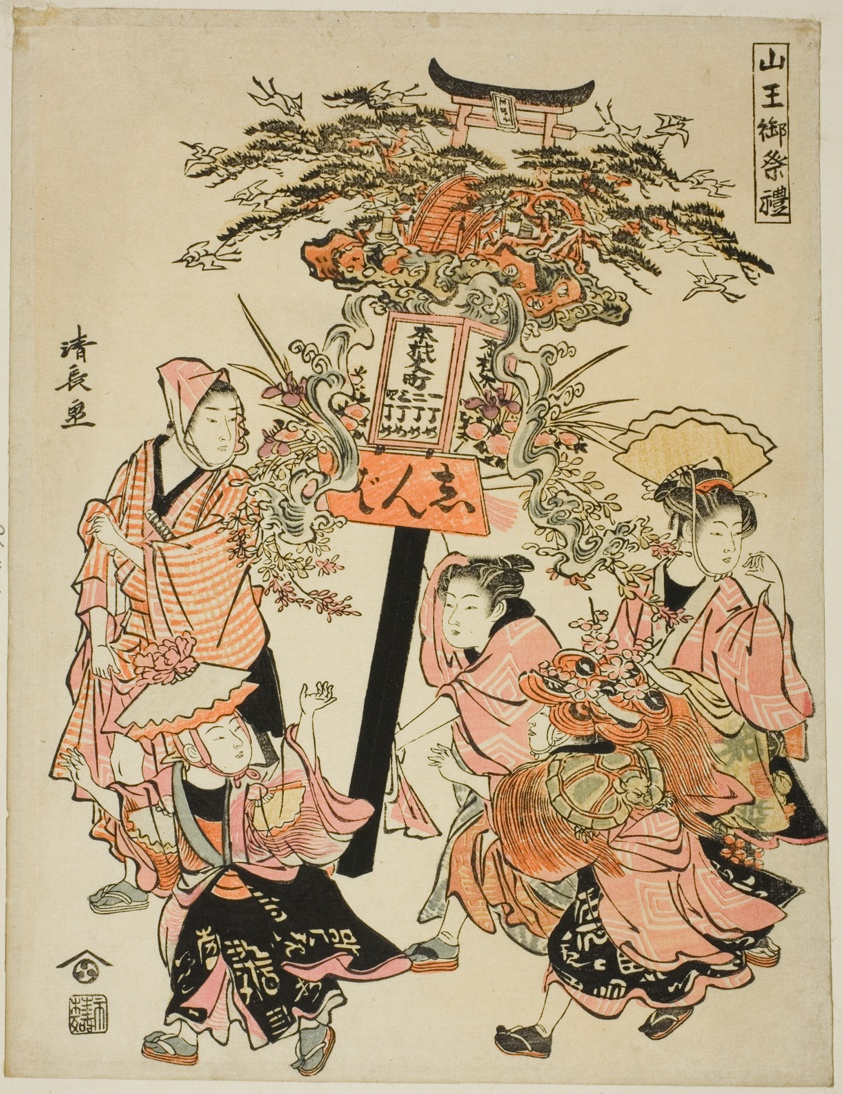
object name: Print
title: Carrying a lantern sponsored by the Motozaimoku-cho, from the series "The Festival of the Sanno Shrine (Sanno gosairei)"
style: Japanese (culture or style)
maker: Torii Kiyonaga (Japanese, 1752-1815)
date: 1780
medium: Color woodblock print; koban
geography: Japan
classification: woodblock print; print; asian art